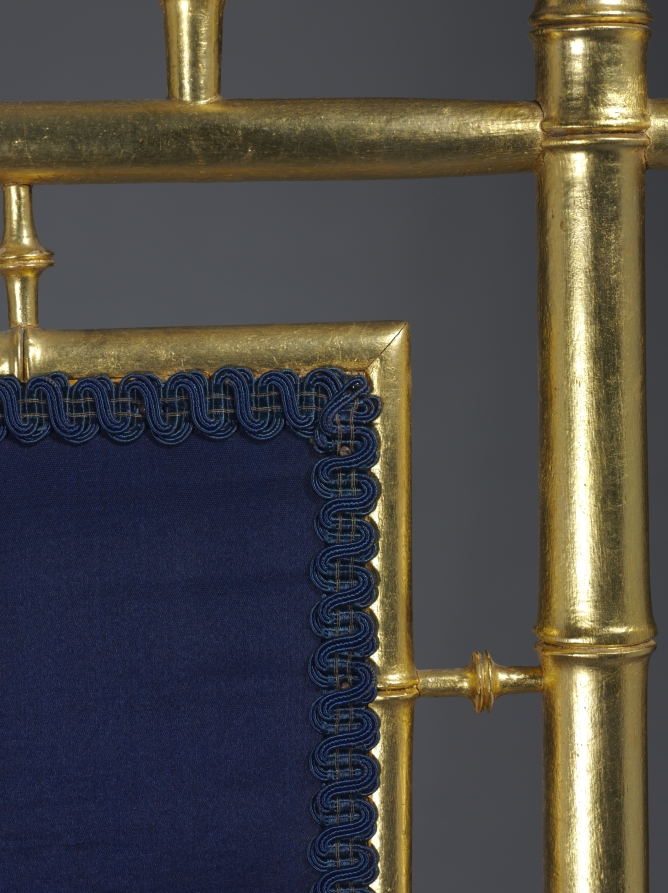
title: Fire Screen with Shell-Matching Game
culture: France, 19th century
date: c. 1870–80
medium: Gilt wood frame with embroidered silk gift cover mounted as a panel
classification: Furniture and woodwork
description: This screen shielded sitters from the heat of a fireplace. The panel incorporates a Japanese cloth gift cover (fukusa), demonstrating the 19th-century fashion in France for Japanese aesthetics. The French frame is carved to resemble bamboo. In Japan, people traditionally draped fukusa over gifts, selecting designs relevant to the occasion. The lids of the hexagonal lacquer game-piece boxes have a crane in clouds and a tortoise in waves, both symbols of longevity. Wedding gift sets often included shell-matching games like the one depicted here. Only the two halves of a specific clamshell can be perfectly matched; game players used the shells’ interior paintings as clues. Games were sometimes painted with episodes from literature, such as the Tale of Genji.